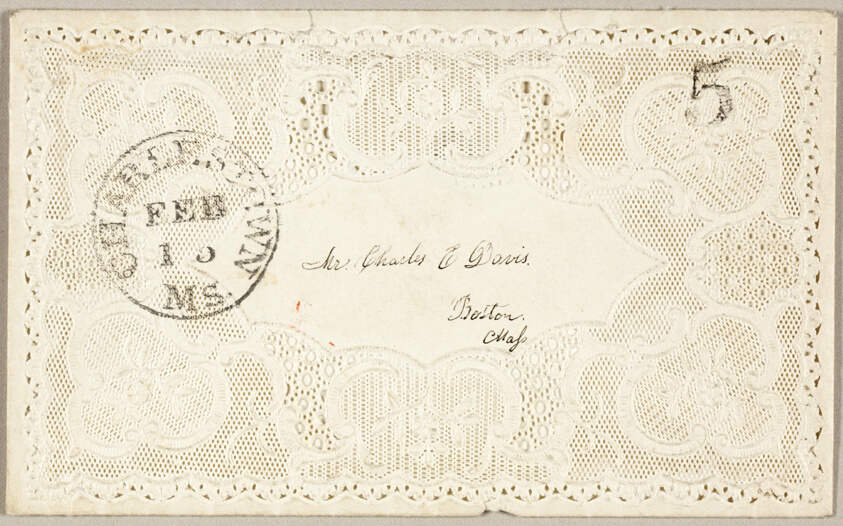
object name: Drawing and Watercolor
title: Valentine envelope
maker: Unknown Artist; American, 19th century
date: 1860/69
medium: Pen and black ink on cut and embossed ivory wove paper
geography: United States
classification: valentine; prints and drawing; paper